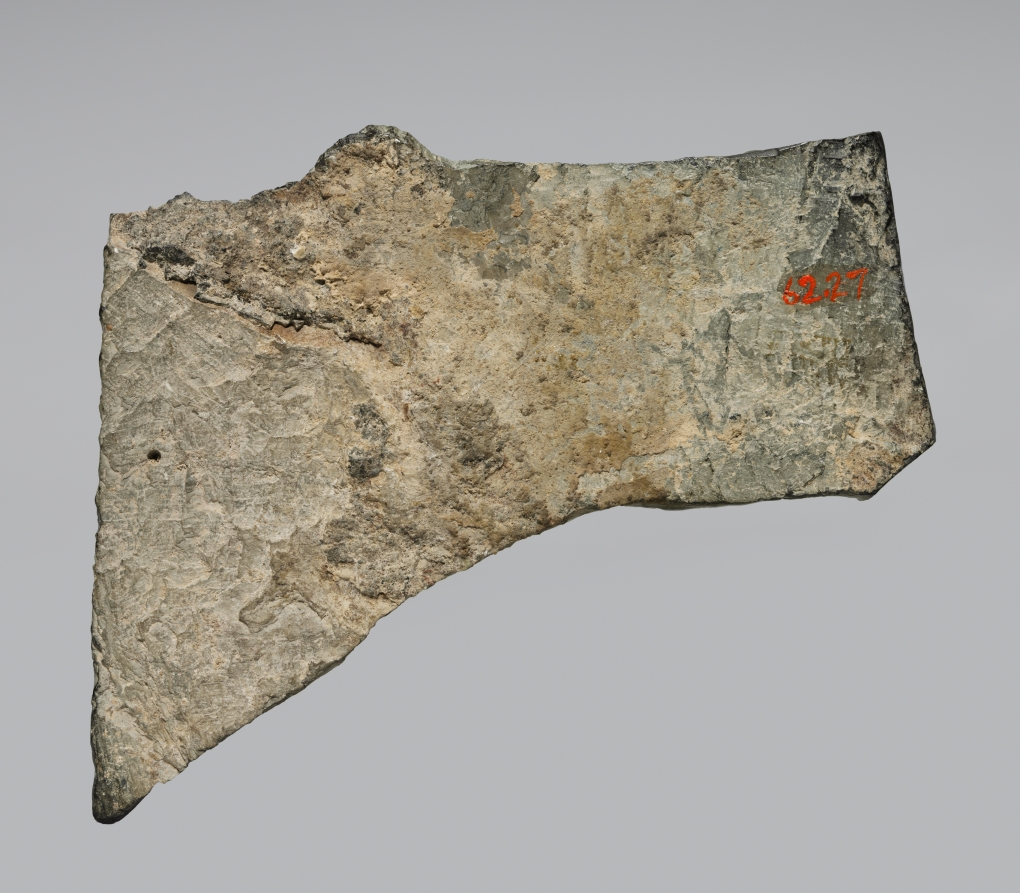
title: Fragment of an Icon with Scenes from Christ's Passion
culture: Byzantium, Byzantine period, 12th century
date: 1100s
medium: steatite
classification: Glyptic